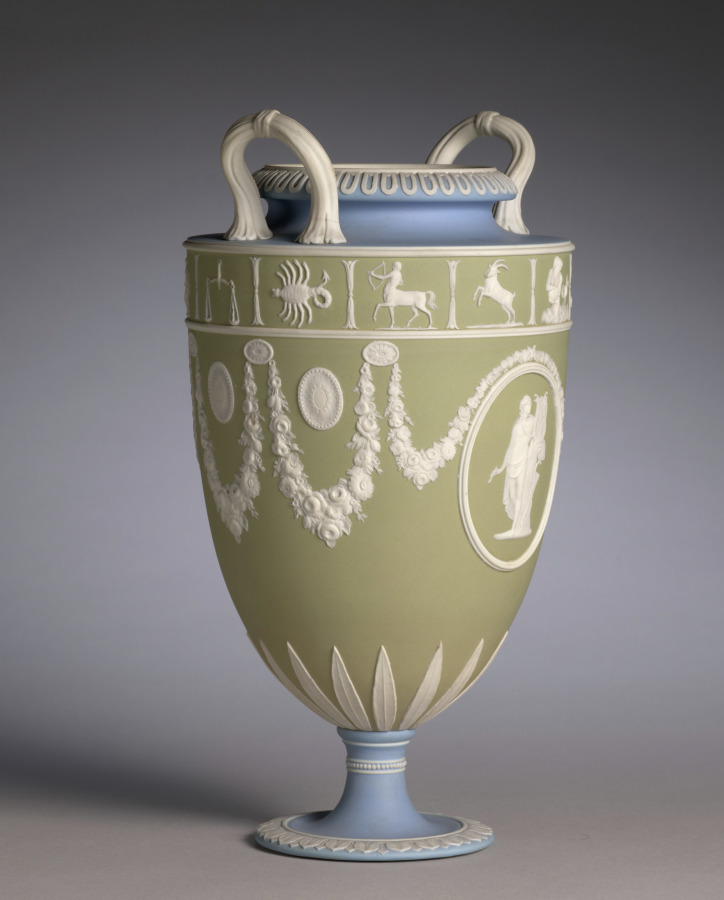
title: Vase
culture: England, Staffordshire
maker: Josiah Wedgwood and Sons (British, Staffordshire, est. 1759)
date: c. 1850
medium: jasper ware with relief decoration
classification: Ceramic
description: Wedgwood's tricolor jasperware first became popular in the 1770s during a period of fascination with neoclassical decoration. This vase was probably made around 1850 during the period when this type of decoration was revived. The relief medallions depict two versions of the Greek god Apollo, the god of music, next to his harp or lyre.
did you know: See cover record.